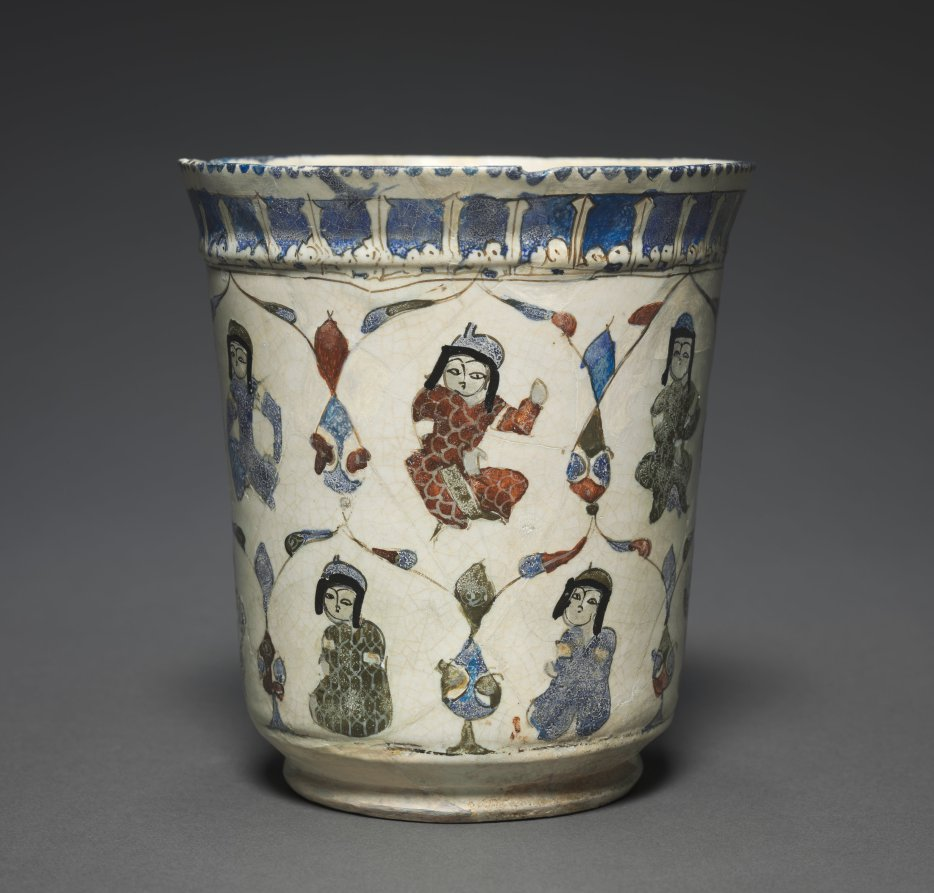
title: Mina'i Beaker with Seated Princes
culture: Iran, Kashan, Seljuq period of Iran (1037–1194)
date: 1180–1220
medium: Fritware with overglaze design, mina’i ware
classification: Ceramic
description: Mina’i ware takes its name from the Persian word for enamel. It was a luxurious type of pottery and used enamel painting to create true polychrome ceramic for the first time. Mina’i ware frequently combines blues, greens, and purples with sharp black and red executed with precise control. Figural scenes are quite common for these vessels and often recall book illustrations including rows of seated court members, sometimes flanking an enthroned ruler, and princely scenes of hunting or falconry.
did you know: A band of Kufic runs around the outside of the rim and another one is around the inside of the rim.